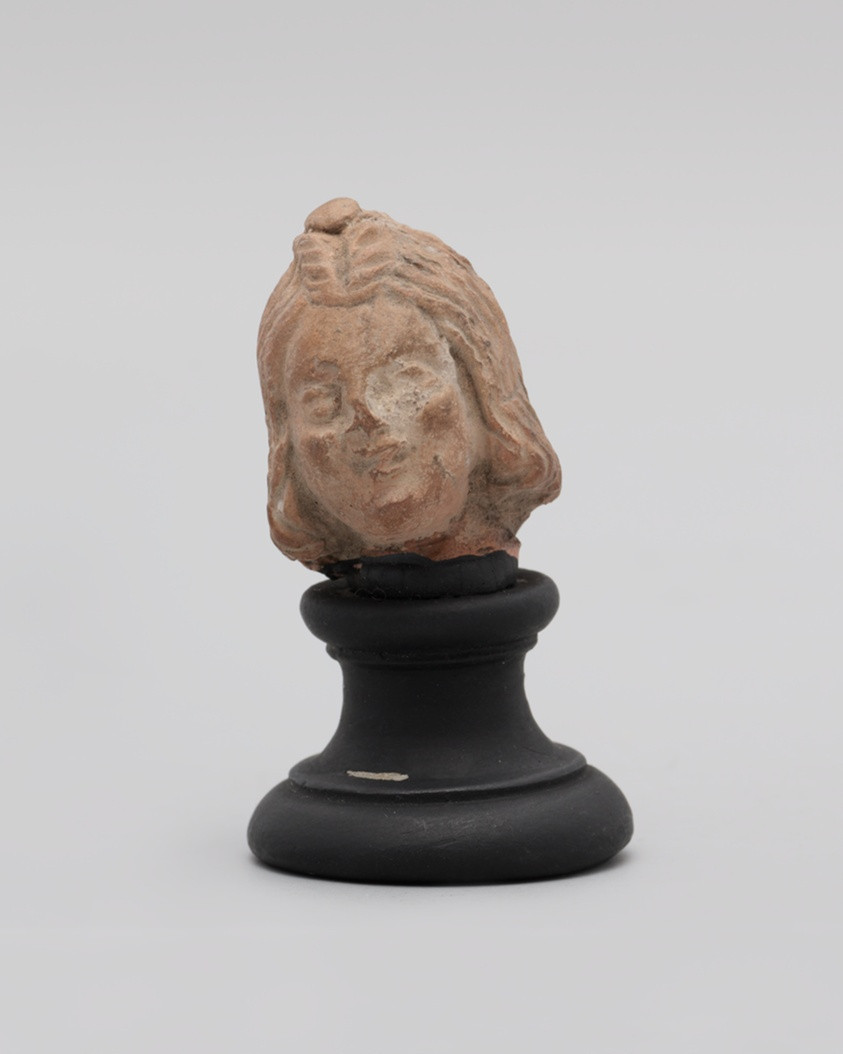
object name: Sculpture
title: Head of a Child or Woman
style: greek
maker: Greek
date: 2nd-1st century BCE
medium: terracotta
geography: Greece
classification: earthenware; ceramics; sculpture; ancient art